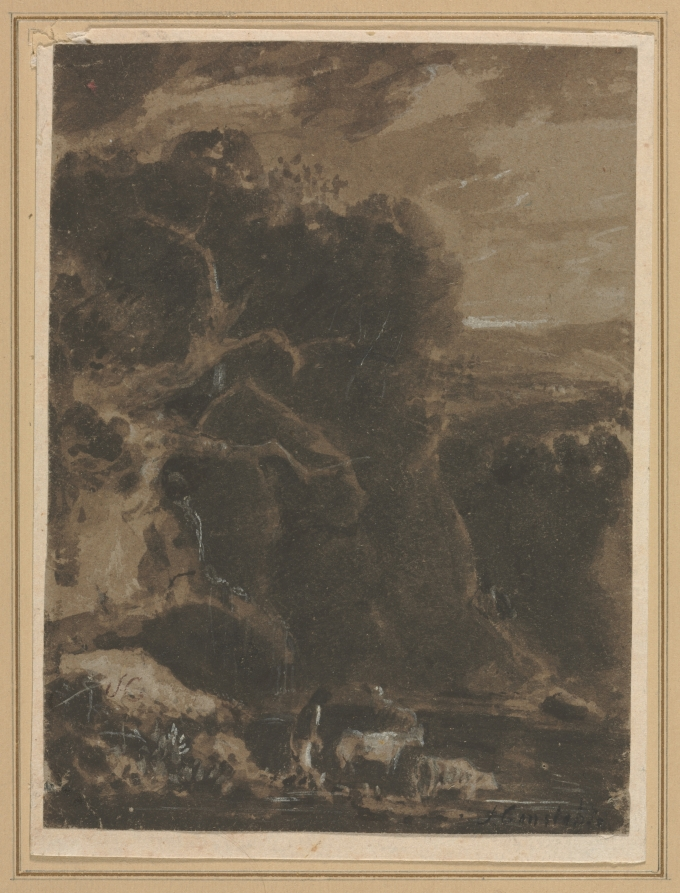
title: The Ford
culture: England, British School, 18th century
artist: Anonymous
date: 1700s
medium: brush and brown ink heightened with white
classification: Drawing